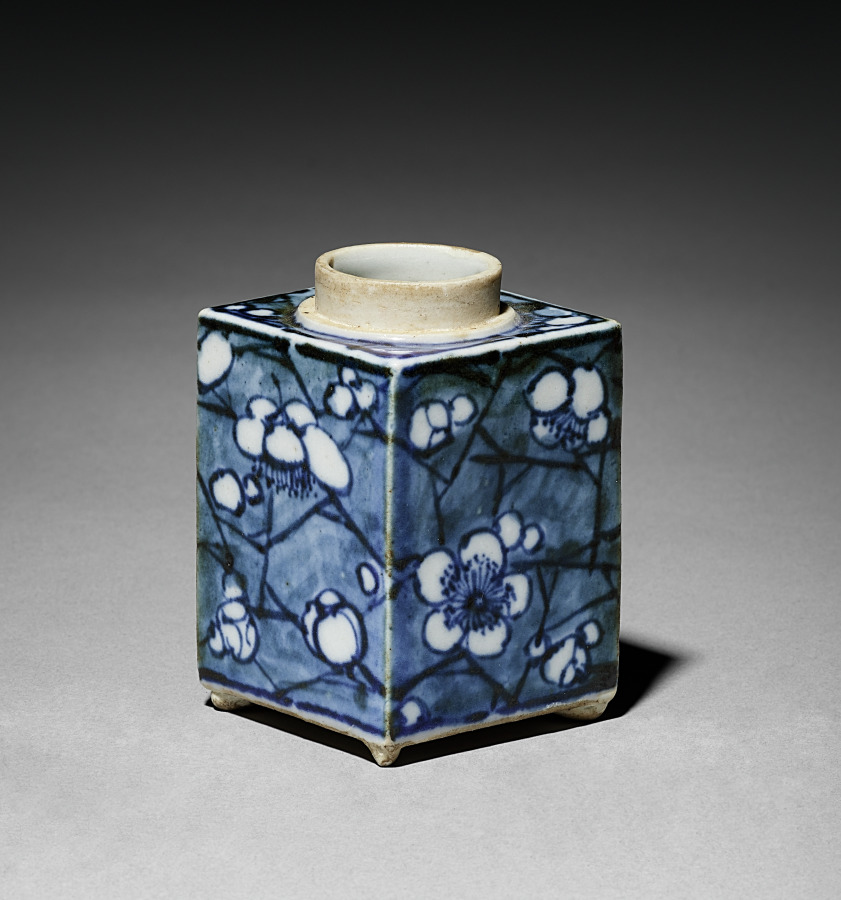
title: Tea Container with Plum Blossoms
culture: Japan, Edo period (1615–1868)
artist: Aoki Mokubei (Japanese, 1767–1833)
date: early 1800s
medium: porcelain with underglaze blue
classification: Ceramic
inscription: signed "Ro Mokubei" on base in underglaze blue.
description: Aoki Mokubei, born into a family of restaurateurs, was a potter, calligrapher, painter, and scholar, and is considered one of the three masters of later Edo period Kyoto ceramics. He specialized in porcelains fashioned after Chinese prototypes, and created works for steeped tea (sencha) such as these matching tea caddies decorated in an underglaze blue called sometsuke—literally “with applied dye.” He signed them on their bottoms. They also have intricately patterned silk sleeves to both beautify and protect them. On the exterior of the lid of the outer wooden box that contains them, it is written that Mokubei inscribed and painted an image on the box. On the interior of the lid, the signature and seals of a former owner are written. Mokubei has signed the lid of the inner box, and a charming ink and light color composition of West Lake in Hangzhou in China covers its three sides. On the fourth side is a long inscription by Mokubei describing the scene.